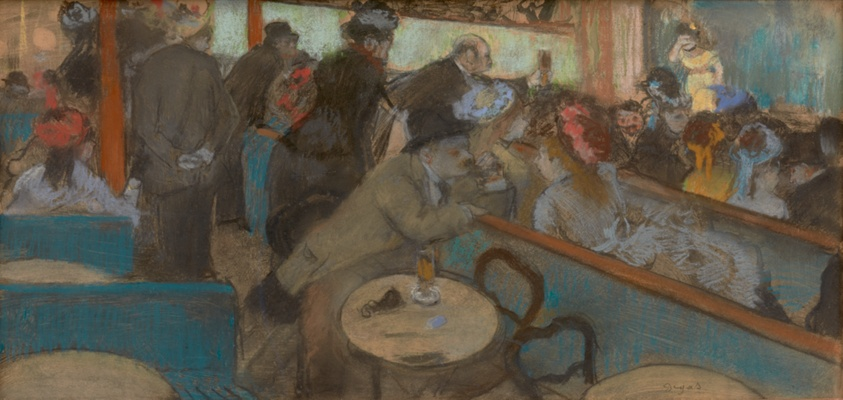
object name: Drawing and Watercolor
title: Café-Concert (The Spectators)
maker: Edgar Degas; French, 1834-1917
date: 1876/77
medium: Pastel over monotype on buff wove paper, laid down on tan card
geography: France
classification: prints and drawing; monotype; pastel; drawings (visual works); paper